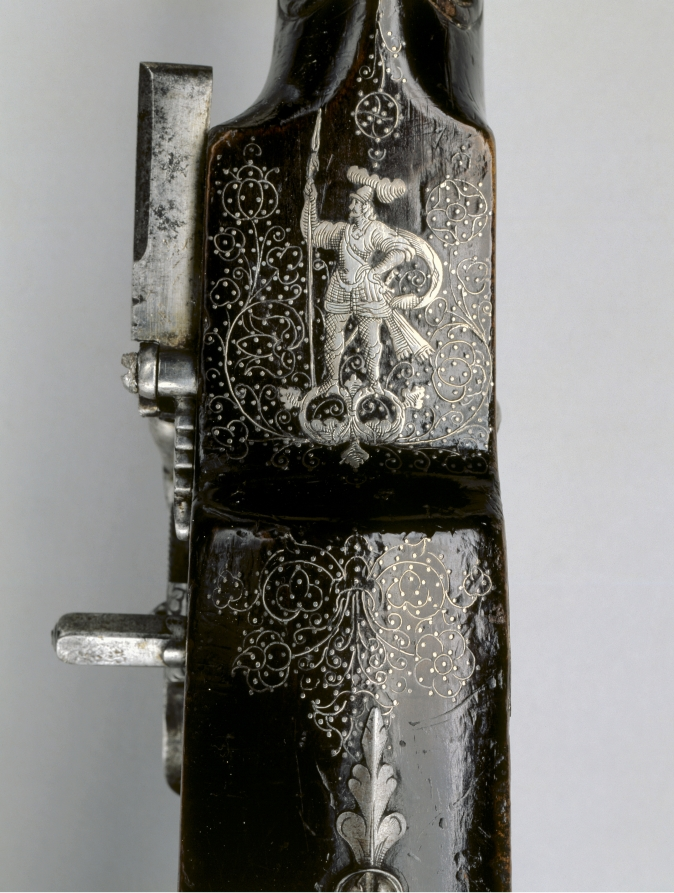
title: Wheel-Lock Hunting Rifle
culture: Austria, Ferlach, mid 17th Century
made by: Hans Schmidt (Austrian, 1669)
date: mid-1600s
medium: steel, varnished wood (walnut) stock decorated with inlaid silver wire and appliqués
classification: Arms and Armor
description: The barrel of this hunting piece is marked with the letters "GS" within a shield, the likely initials of the owner, who was probably a member of the Order of the Golden Fleece as indicated by the escutcheon on the stock.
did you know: A similar rifle made for another member of the Order of the Golden Fleece, Graf Sigmund von Dietrichstein, is preserved in Vienna.